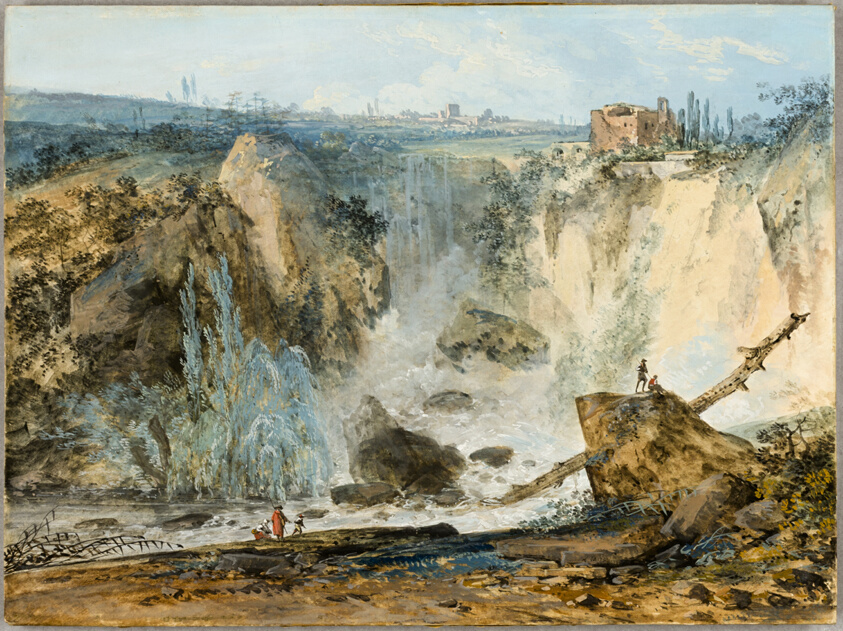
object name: Drawing and Watercolor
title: Waterfall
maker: Louis Gabriel Moreau (French, 1740-1806)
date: 1788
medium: Gouache, over traces of graphite, on cream laid paper, edge mounted on board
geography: France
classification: gouache; drawings (visual works); prints and drawing